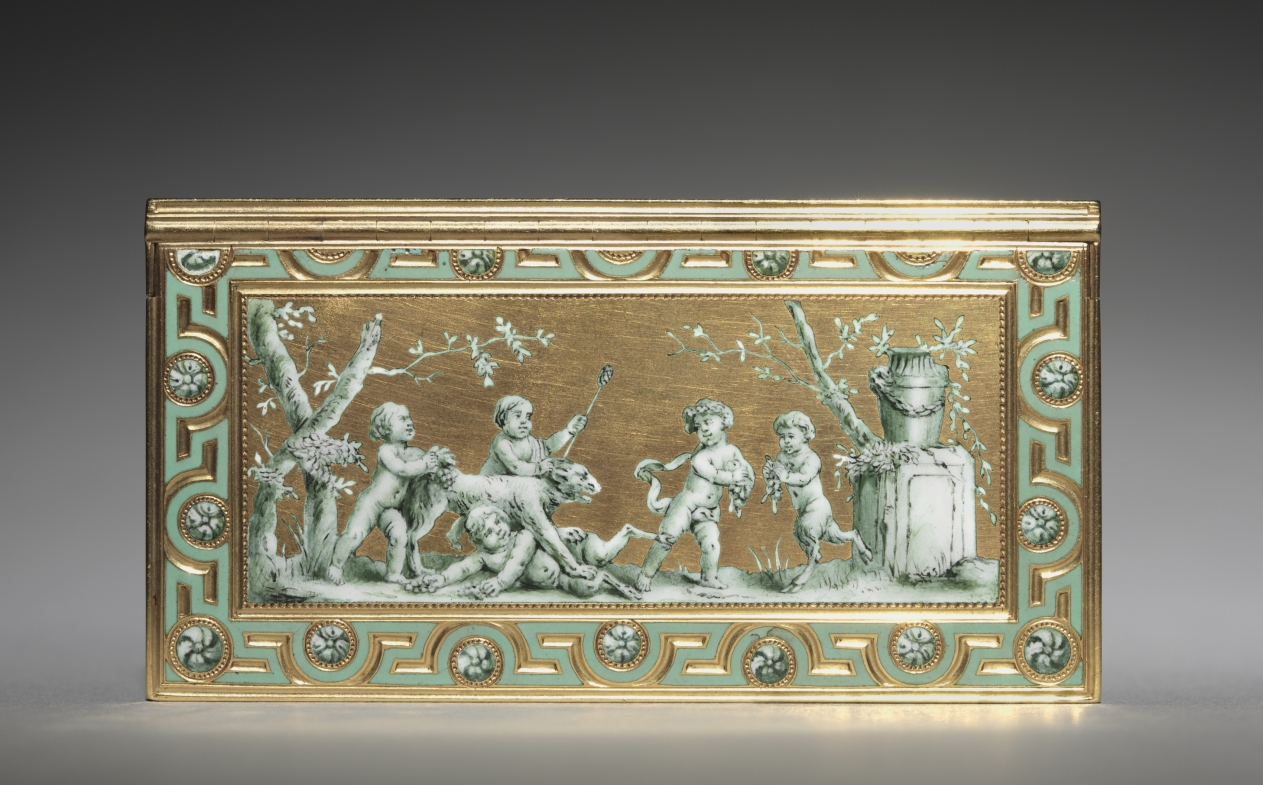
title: Box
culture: France, 18th century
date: c. 1768–1769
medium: gold and enamel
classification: Enamel